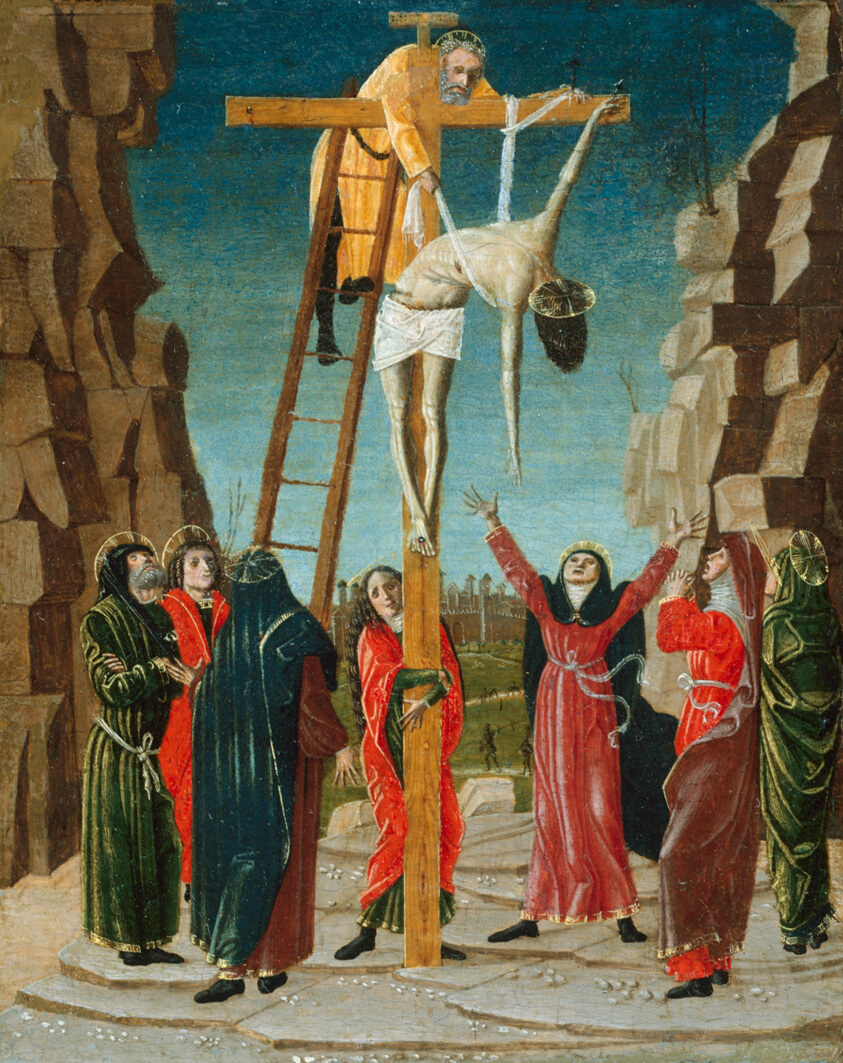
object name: Painting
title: The Descent from the Cross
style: 15th century, Renaissance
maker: Bernardino Butinone (Italian, c. 1450-before 1510)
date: c. 1485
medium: Tempera on panel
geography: Italy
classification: tempera; Italian; paint; painting; european painting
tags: cross, Mourning, landscape, figures, men, Jesus, saints, women, death, Century of Progress, world's fairs, Chicago World's Fairs